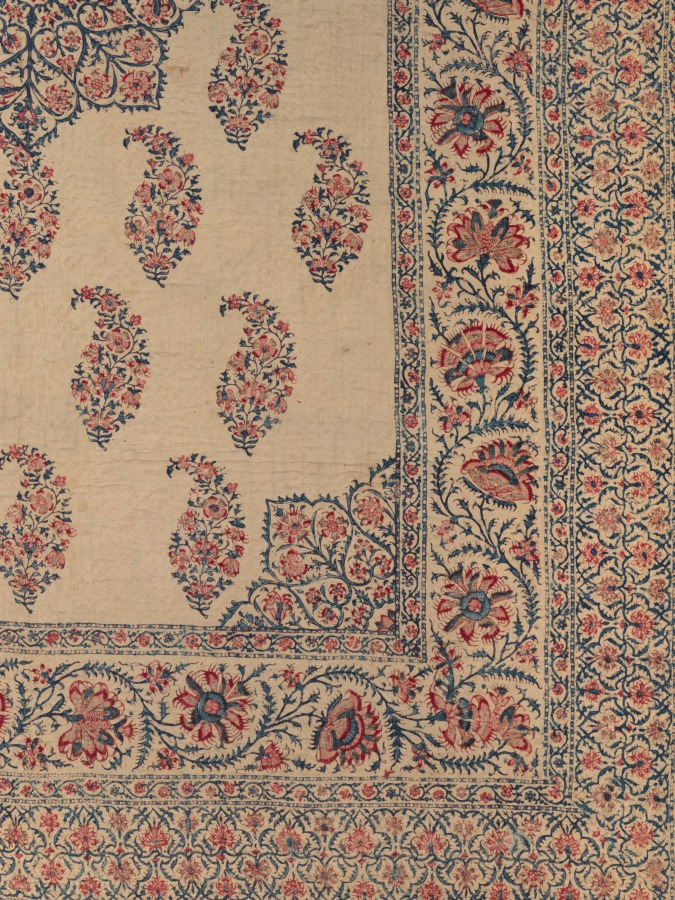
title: Prayer Mat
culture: India, early 19th century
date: early 1800s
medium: block printed and painted quilted cotton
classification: Textile